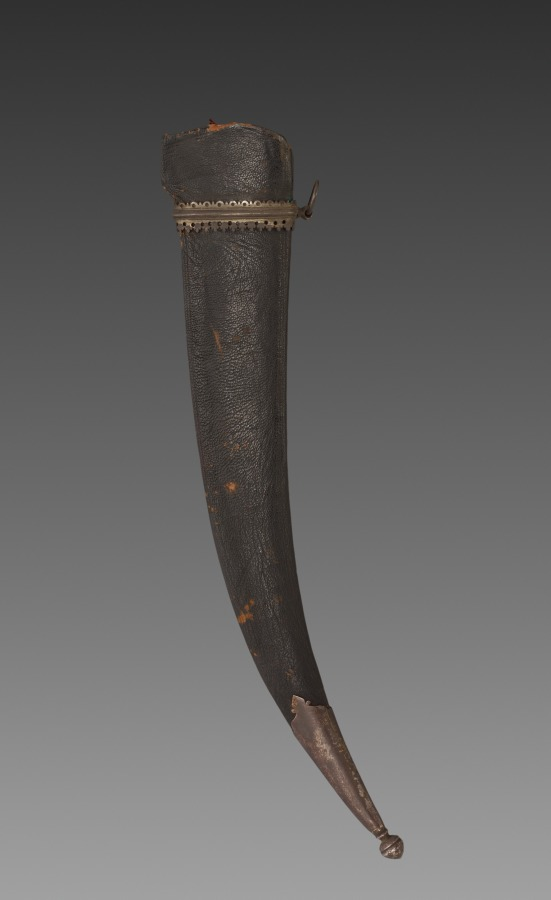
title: Scabbard for Knife with Jade Handle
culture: East India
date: c. 1750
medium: leather with silver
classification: Arms and Armor